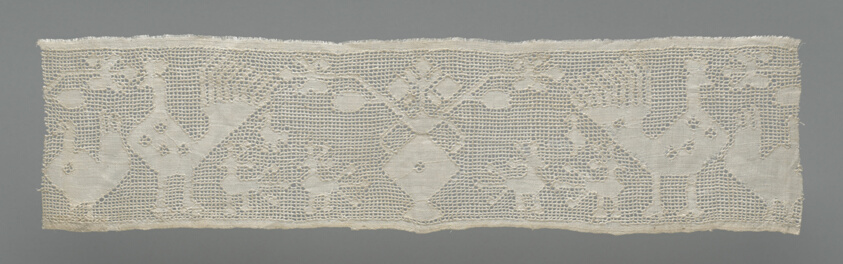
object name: Textile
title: Border (From a Cover)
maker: Southern Italy or Sicily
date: 1675/1725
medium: Linen, pulled thread work in overcast stitches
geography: Southern Italy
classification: textile; needlework (visual works)